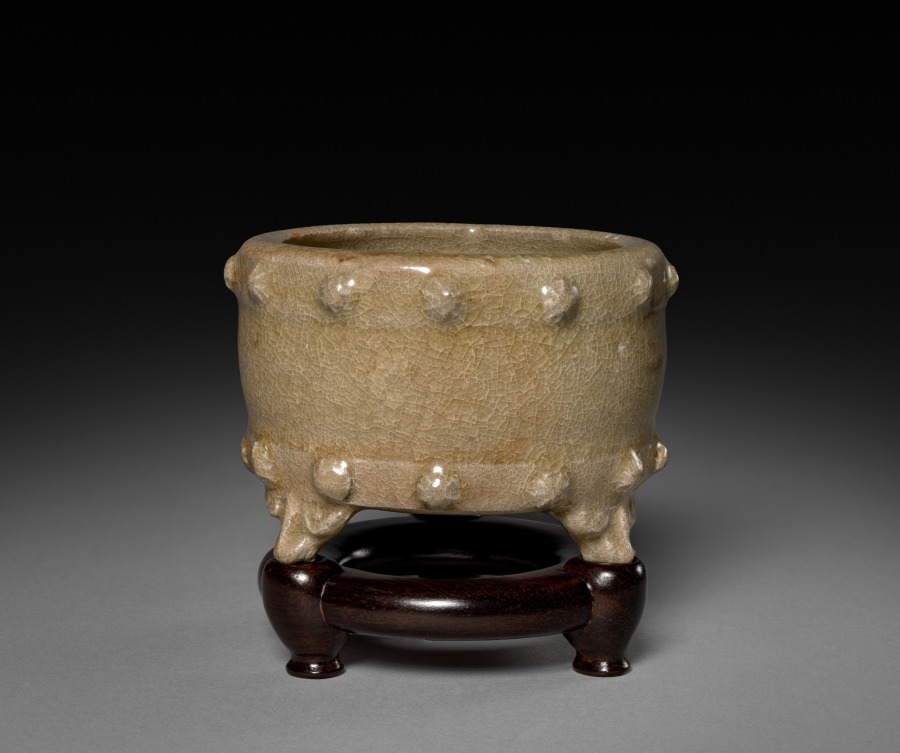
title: Incense Burner: Southern Celadon Ware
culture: China, Yuan dynasty (1271-1368)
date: 1271–1368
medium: glazed buff stoneware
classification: Ceramic